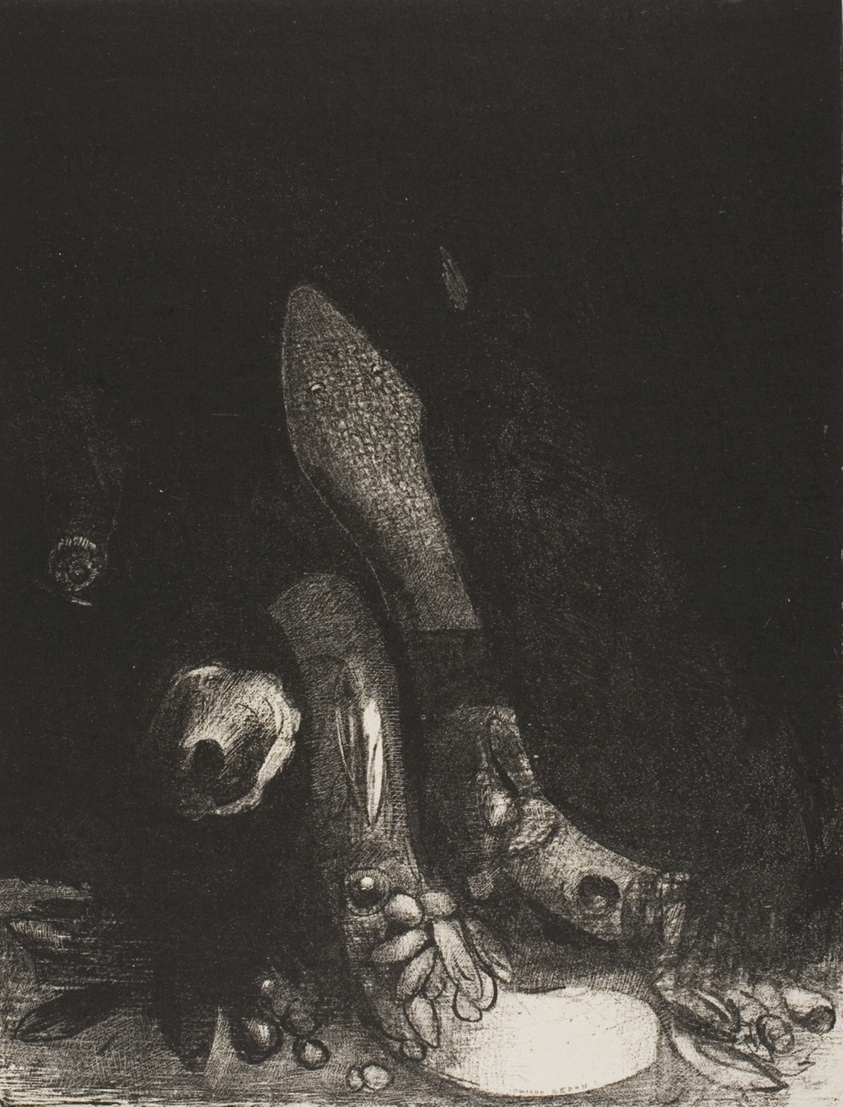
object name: Print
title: Flowers Fall and the Head of a Python Appears, plate 5 of 24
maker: Odilon Redon (French, 1840-1916)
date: 1896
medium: Lithograph in black on ivory China paper laid down on ivory wove paper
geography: France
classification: lithograph; print; prints and drawing; paper